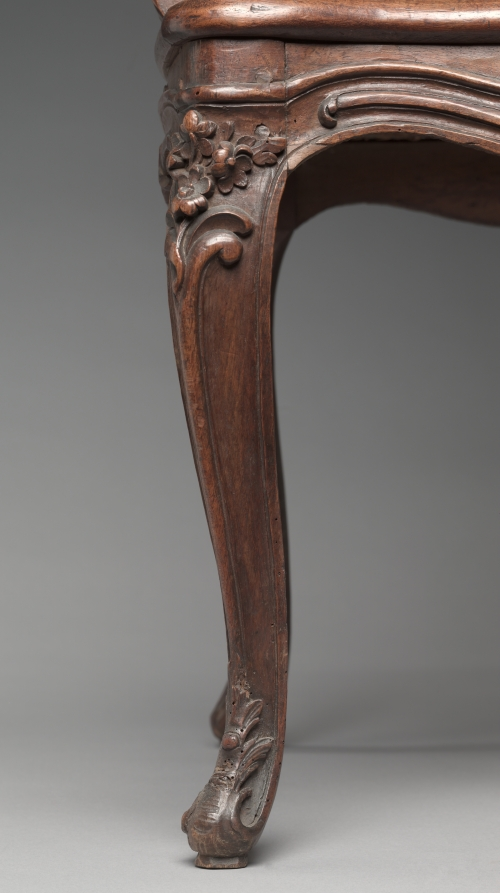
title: Armchair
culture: France, 18th century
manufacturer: René Cresson (French, c. 1705–c. 1749)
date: c.1740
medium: carved wood, cane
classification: Furniture and woodwork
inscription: signed underneath on strip across back: "CRESSON LAINE" (the trademark for René Cresson).